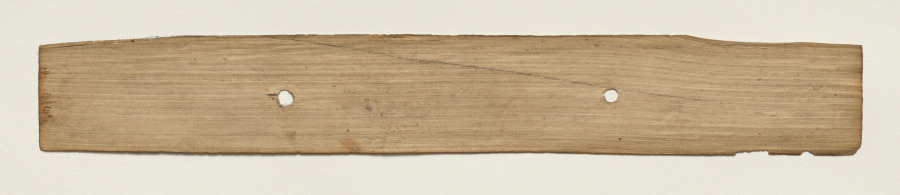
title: Leaf from a Buddhist Manuscript (verso)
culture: Sri Lanka, Singhalese, Late 17th century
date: c. 1700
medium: fiber paper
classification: Manuscript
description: Palm leaf material is still used for manuscripts in Sri Lanka. The palm leaves are prepared first by boiling them, drying them in the sun, and then rubbing them with oils. Scribes then use a metal stylus to incise the text. Then charcoal powder is wiped across the pages, filling in only the inscribed lines.